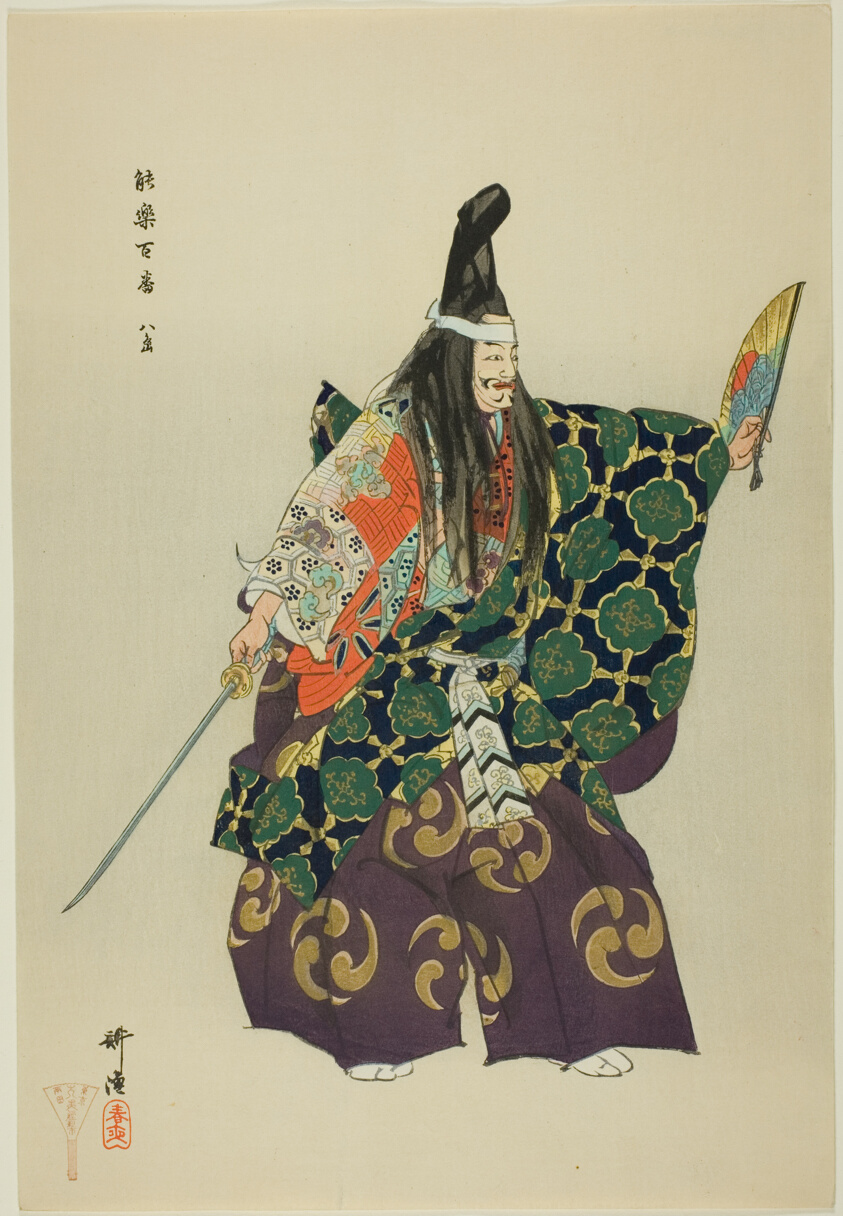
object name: Print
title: Yashima, from the series "One Hundred No Dramas (Nogaku hyakuban)"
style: Japanese (culture or style)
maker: Tsukioka Kogyo; Japanese, 1869-1927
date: 1898/1903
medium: Color woodblock print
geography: Japan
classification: woodblock print; print; asian art